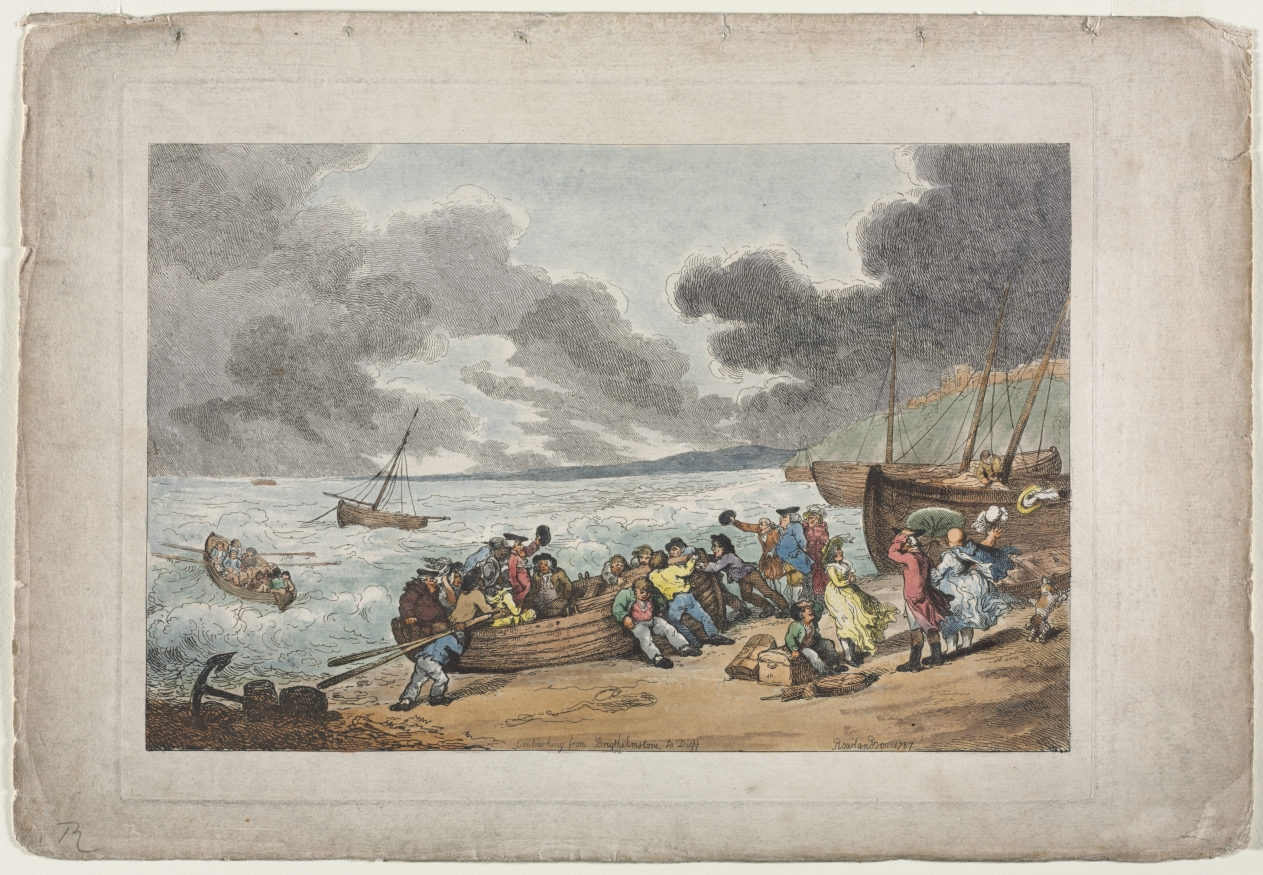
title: Embarking from Brighthelmstone to Dieppe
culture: England, 18th century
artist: Thomas Rowlandson (British, 1756–1827)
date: 1787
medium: etching, hand colored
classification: Print